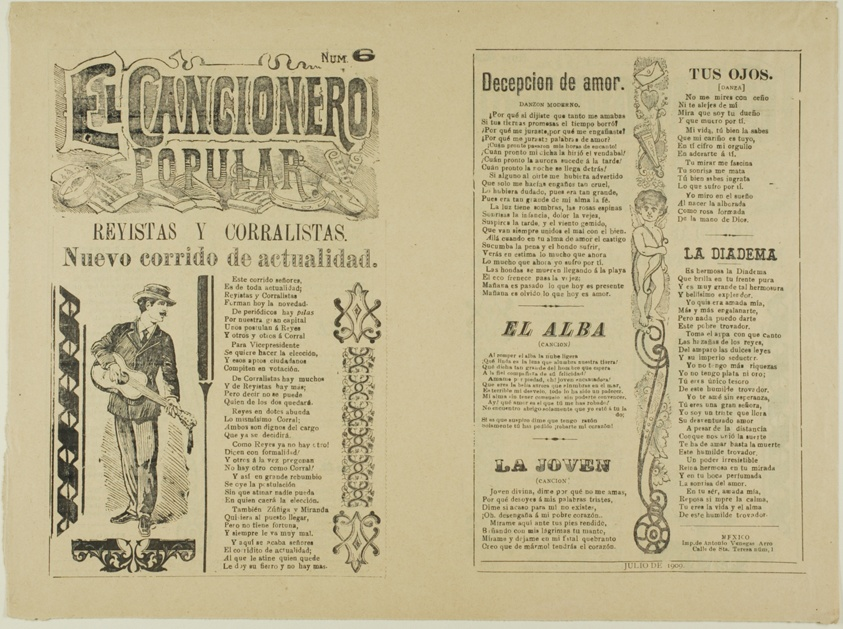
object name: Print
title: The Popular Songbook, no. 6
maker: José Guadalupe Posada (Mexican, 1852-1913)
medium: Relief etching on wove paper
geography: Mexico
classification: relief etching; print; prints and drawing